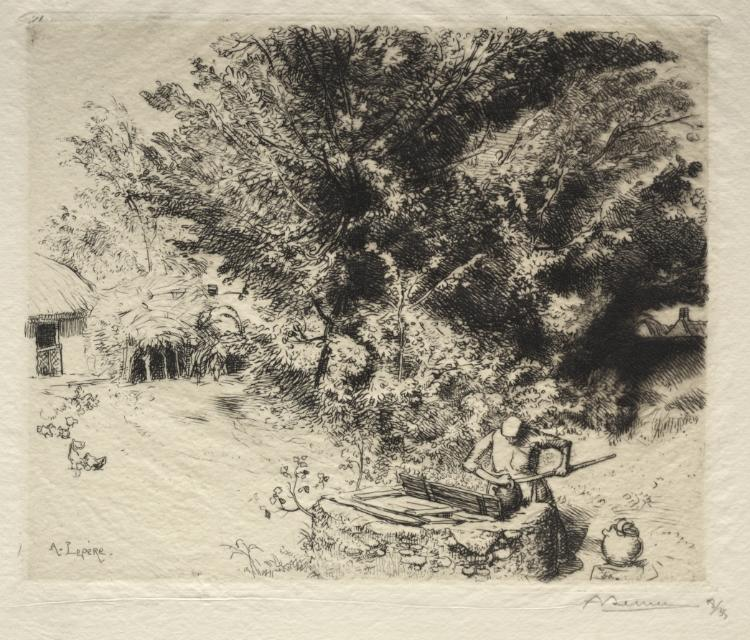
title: The Pit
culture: France, 20th century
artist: Auguste Louis Lepère (French, 1849–1918)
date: 1911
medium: etching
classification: Print